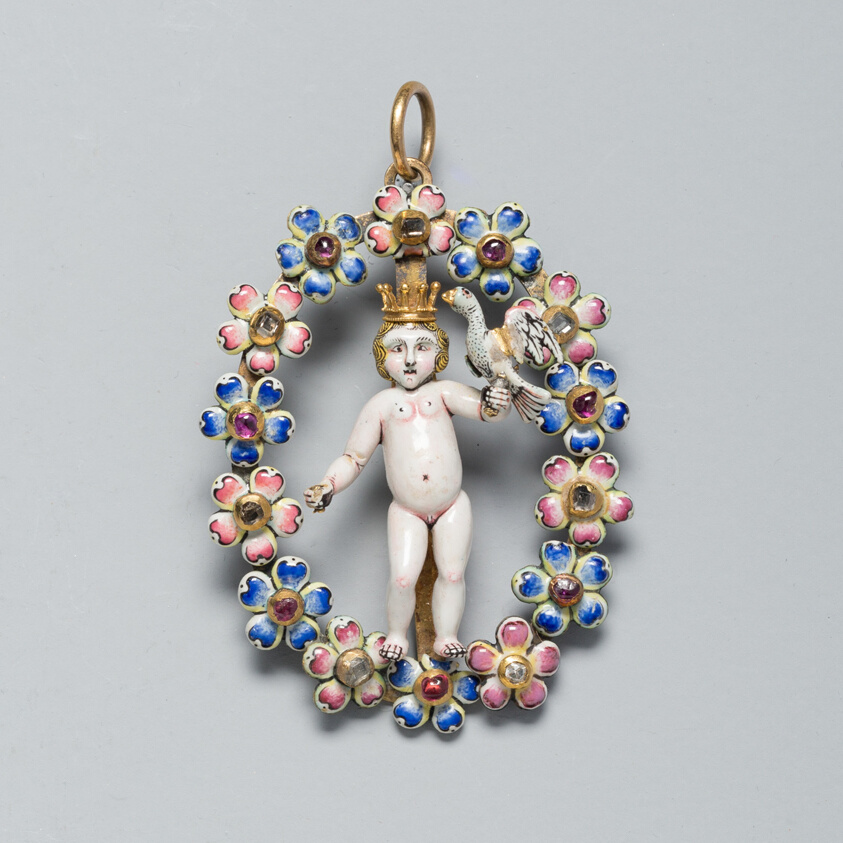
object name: Costume and Accessories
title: Pendant with the Christ Child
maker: Spanish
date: c. 1650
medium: Gold, enamel, rubies, and diamonds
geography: Spain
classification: pendant (jewelry); jewelry; european decorative arts; costume